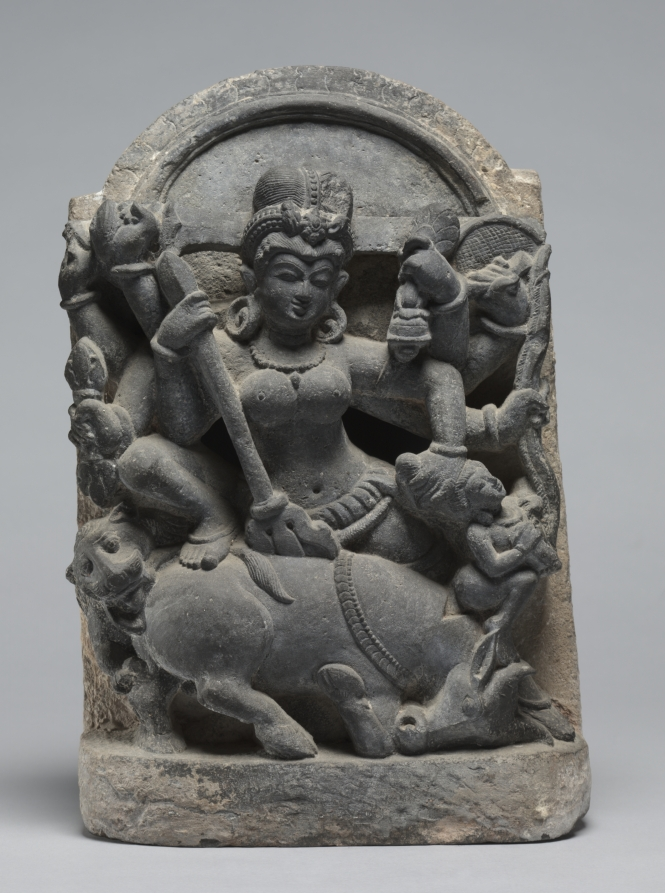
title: Durga Slaying the Buffalo Demon Mahisha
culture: India, Badra, Central Northeastern style, early Medieval, 9th century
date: 800s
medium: stone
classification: Sculpture